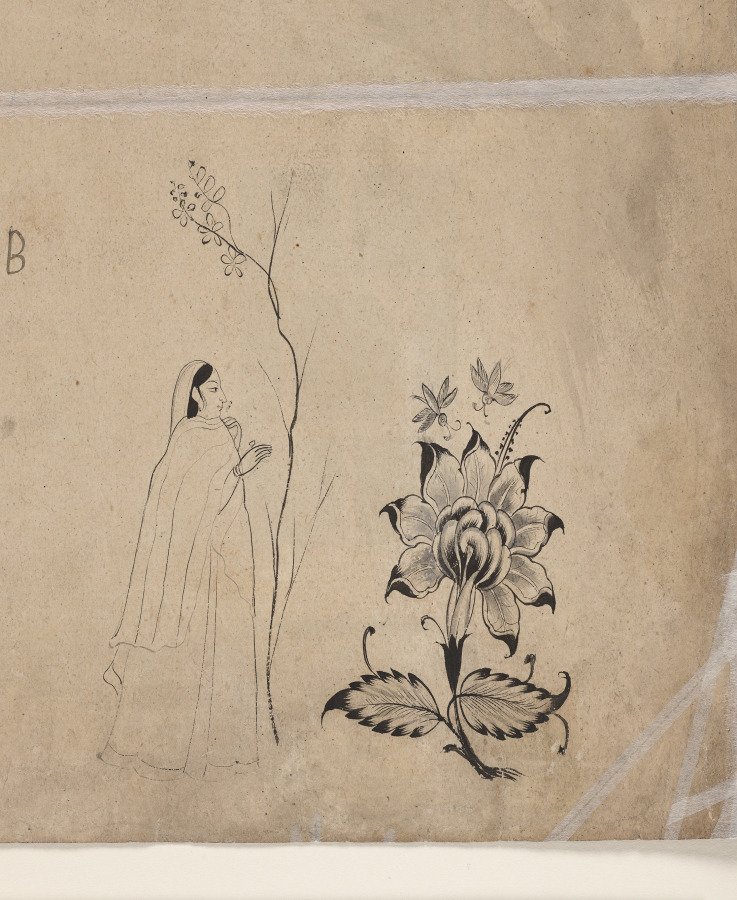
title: Two Elephants Fighting in a Courtyard Before Muhammad Shah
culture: India, Guler school, 18th century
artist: attributed to Nainsukh (Indian, 1710–1778)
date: c. 1730–40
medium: Gum tempera and ink on paper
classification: Painting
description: The Mughal emperor responsible for a revival of courtly arts and pastimes was Muhammad Shah (reigned 1719–48). This painting was made by an artist from a small kingdom in the western Himalayas who stayed at the Mughal court in Delhi and painted scenes of his experiences. Like his predecessors, Muhammad Shah enjoyed watching elephant fights. He is shown in his window of public audience, marked by a golden carpet, smoking a hookah. Women from his harem can be seen looking on from behind painted screens. Two pairs of men hold fire brands and spears to prevent the elephants from running off and to keep them under control. The intensity of the fight—captured at a moment when one mahout, or elephant trainer, has dropped his goad and is about to jump off—is augmented by the dense colors and forms in contrast to the otherwise pale planes, balanced only by the strip of palace windows.